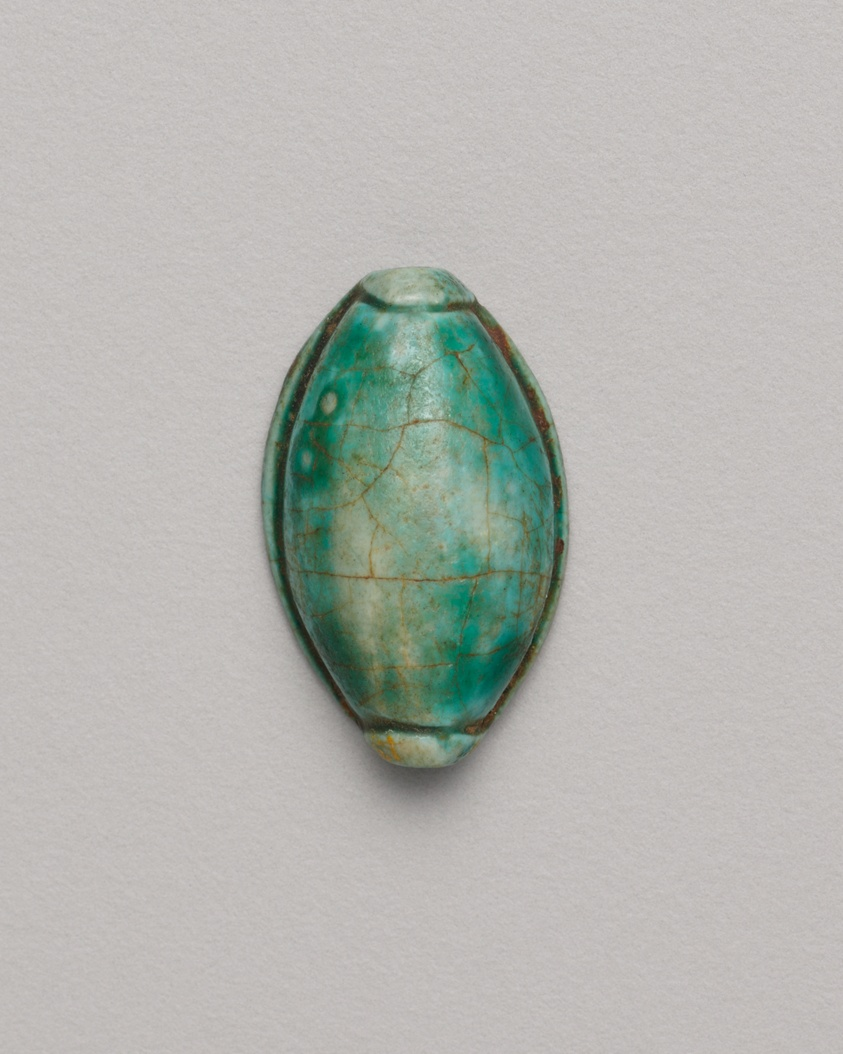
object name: Costume and Accessories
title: Cowroid Amulet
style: new kingdom, ancient, eighteenth dynasty, egyptian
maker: Egyptian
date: New Kingdom, Dynasty 18 (about 1550–1069 BCE)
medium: Glazed steatite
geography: Egypt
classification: amulet; jewelry; ancient art; costume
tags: shells, vessels, floral motifs, Hieroglyphs